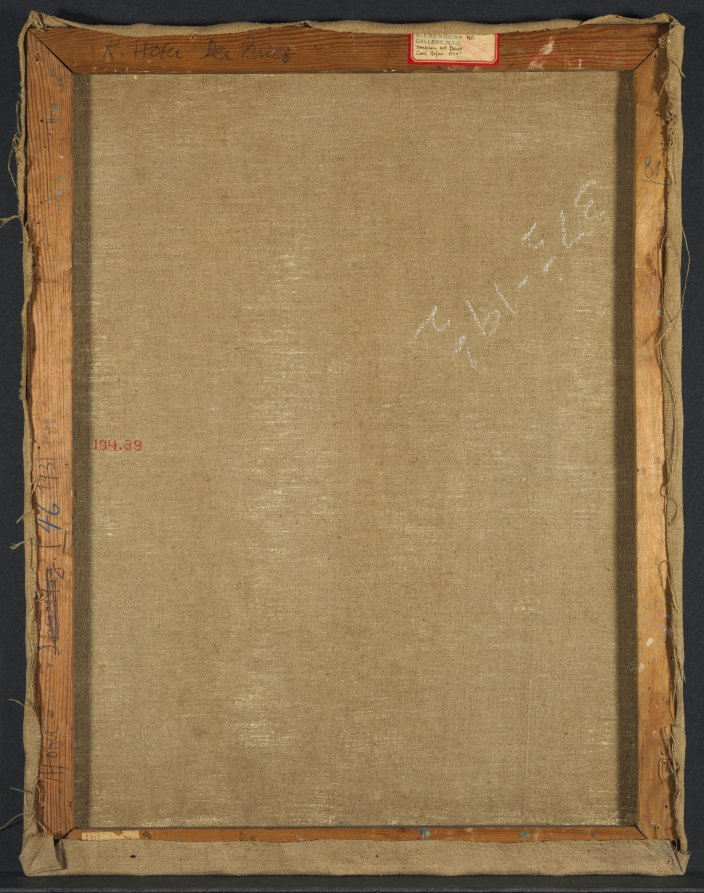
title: The Letter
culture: Germany, 20th century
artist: Karl Hofer (German, 1878–1955)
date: 1934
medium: oil on canvas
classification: Painting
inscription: signed lower right: CH34 [monogram]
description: Hofer's art is filled with disillusionment and pessimism, expressing his dark vision of modern life through a limited range of themes that the artist repeated obsessively. Born in Karlsruhe, Hofer settled in Berlin in 1913. Condemned by the Nazis as a "degenerate artist," in 1933 he was dismissed from his teaching post. In 1943 Hofer's studio and most of his work were destroyed by bombing.